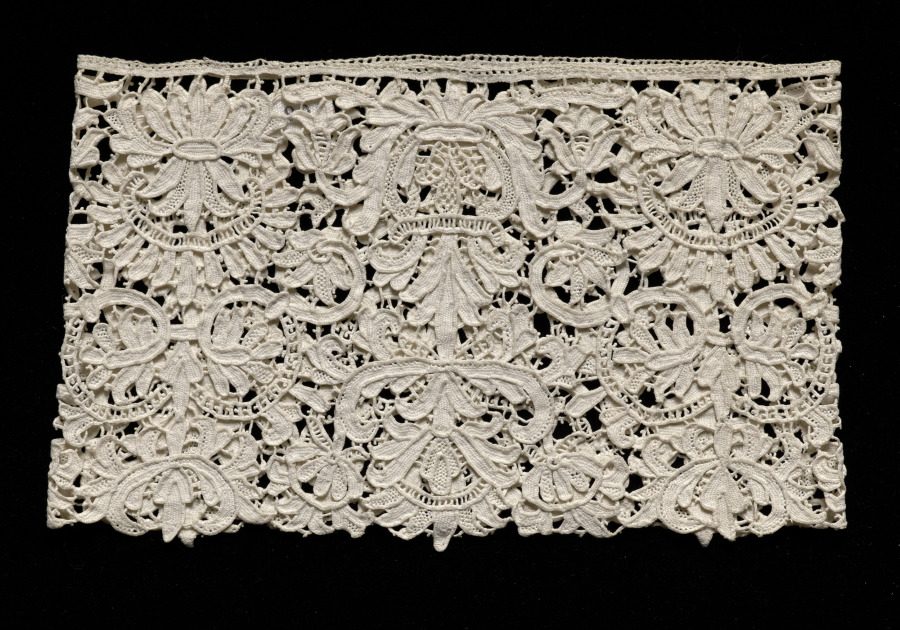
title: Lace Cuff (one of a pair)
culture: Italy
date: 1600–1640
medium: Needle lace (punto in aria)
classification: Lace